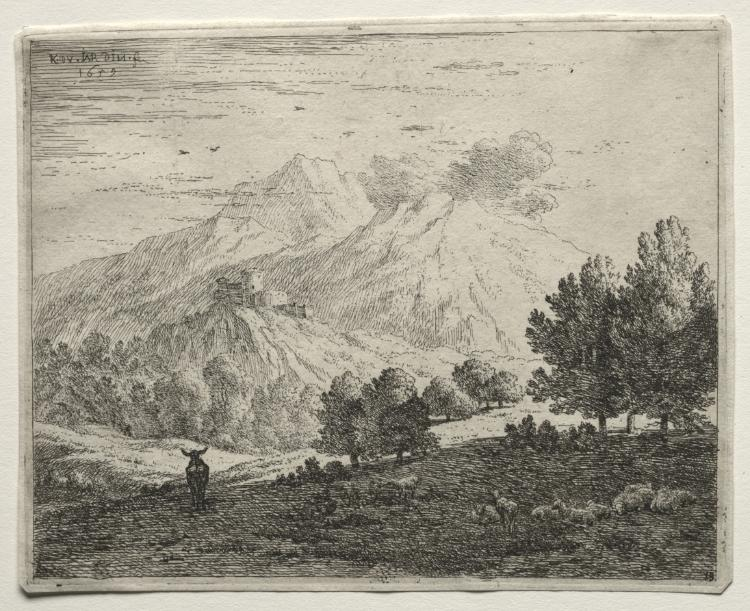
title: The Four Mountains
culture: Netherlands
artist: Karel Dujardin (Dutch, c. 1622–1678)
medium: etching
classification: Print